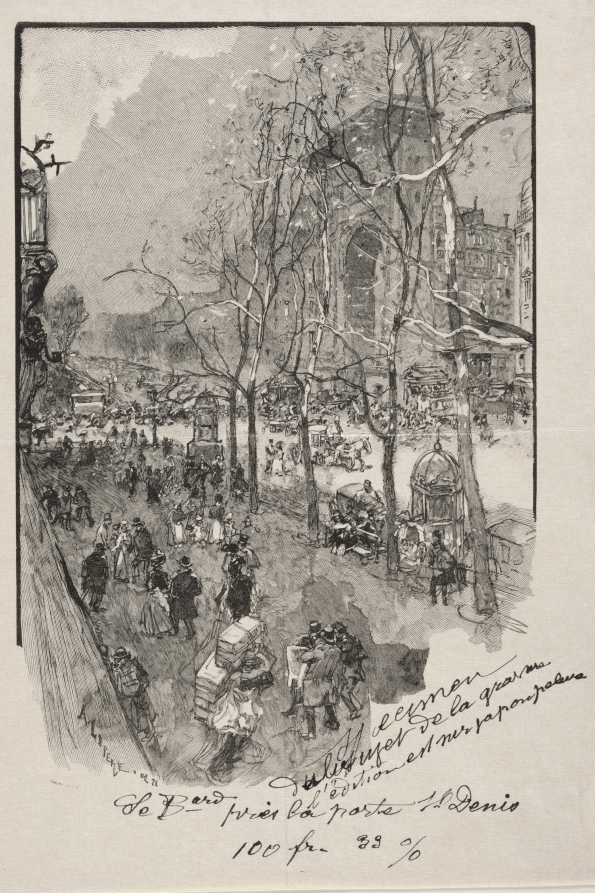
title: Les Boulevards, près de la Porte St. Denis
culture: France, 19th-20th century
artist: Auguste Louis Lepère (French, 1849–1918)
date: 1890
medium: wood engraving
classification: Print